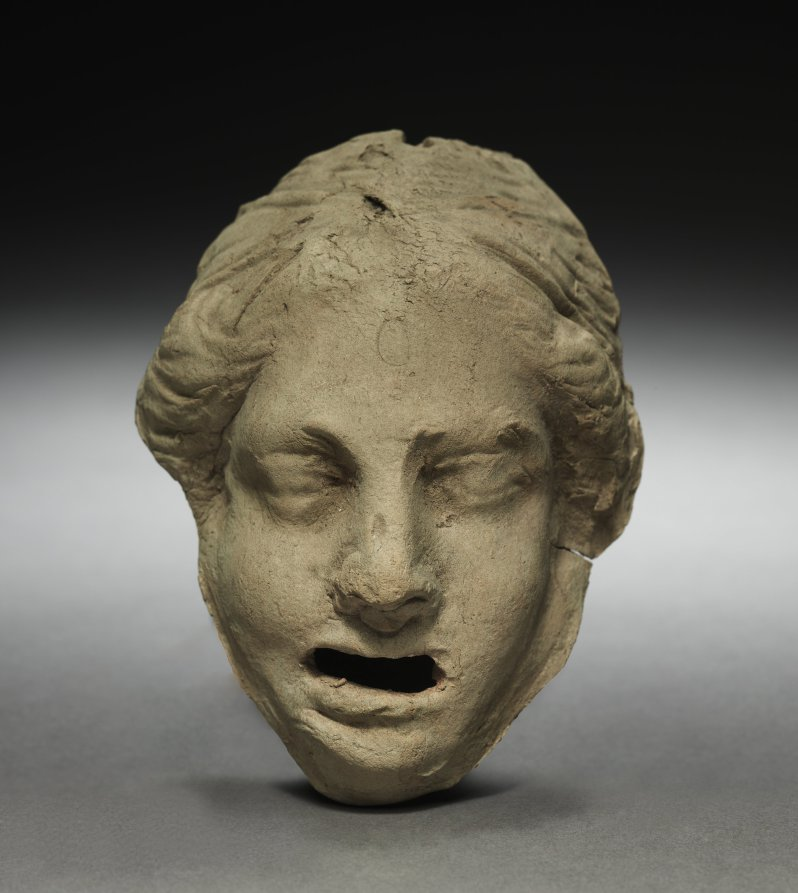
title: Head of a Weeping Woman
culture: Parthian Empire (247 BCE–224 CE)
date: 1–200 CE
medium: terracotta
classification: Sculpture